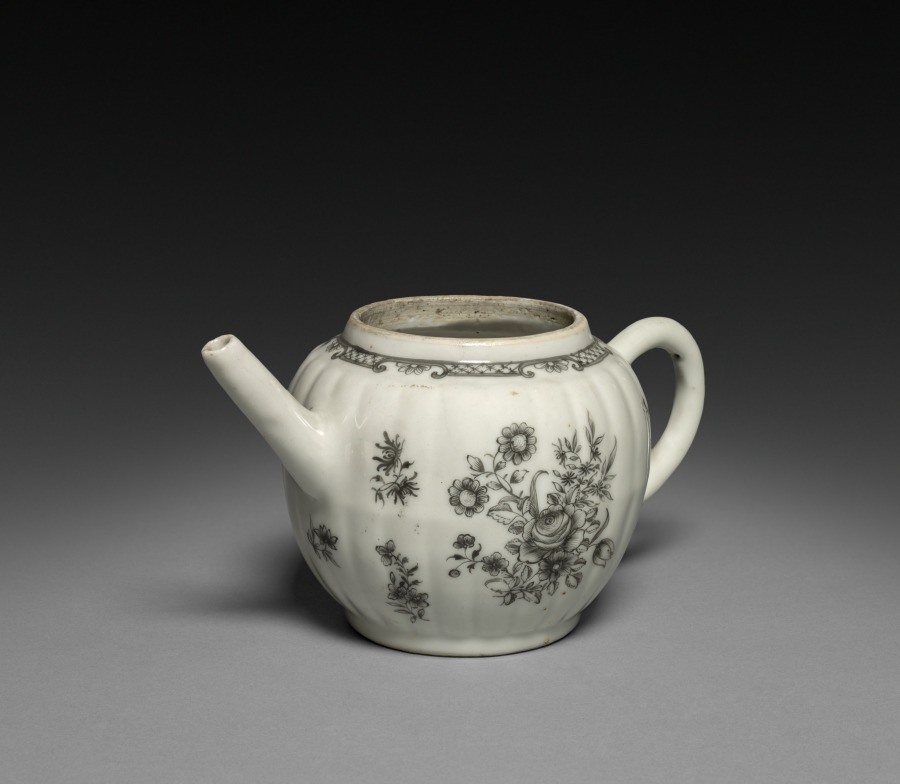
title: Teapot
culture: China, Chinese Export -- European Market, 18th century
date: c. 1750–1770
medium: porcelain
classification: Ceramic